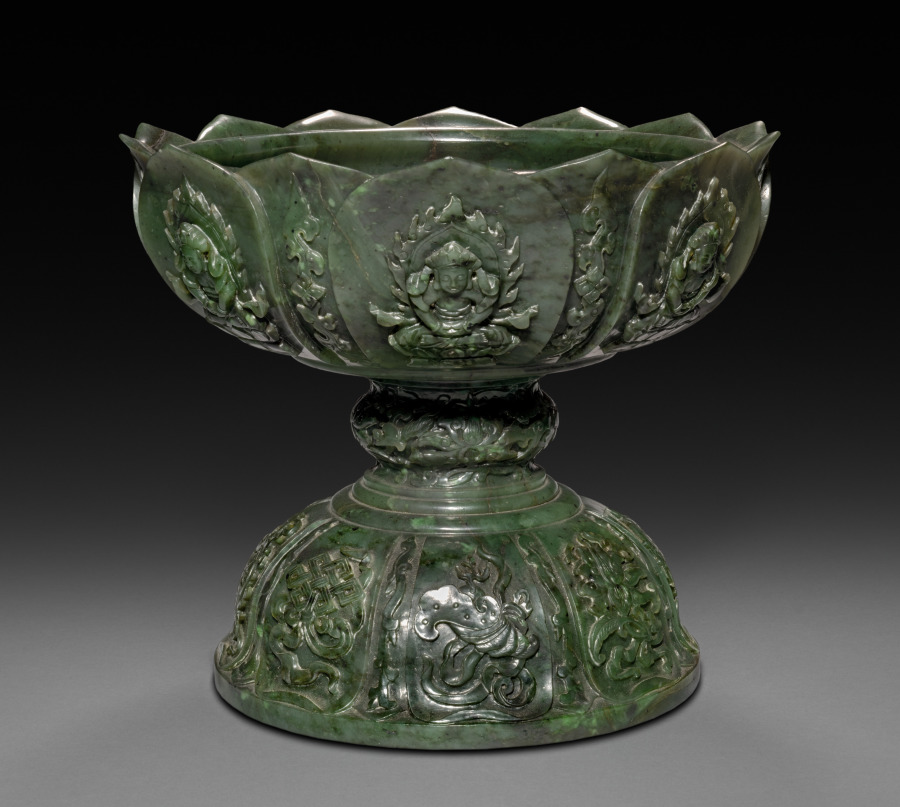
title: Offering Container in Form of Alms Bowl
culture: China, Qing dynasty (1644-1911)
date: 1700s or later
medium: jade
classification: Jade